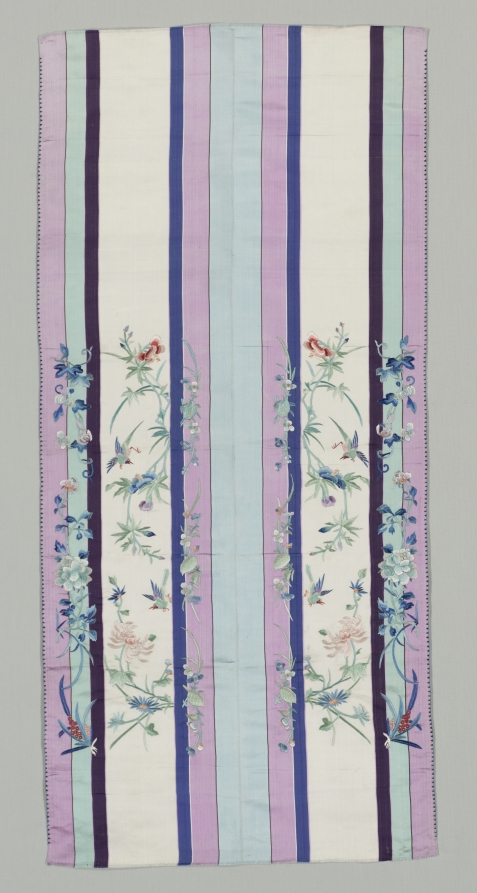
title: Uncut Sleeve Turnbacks for Manchu Woman's Coat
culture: China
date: 1900–1950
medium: satin weave silk with silk embroidery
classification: Garment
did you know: The embroidery was executed with silk thread in satin stitch on a silk background of satin weave.